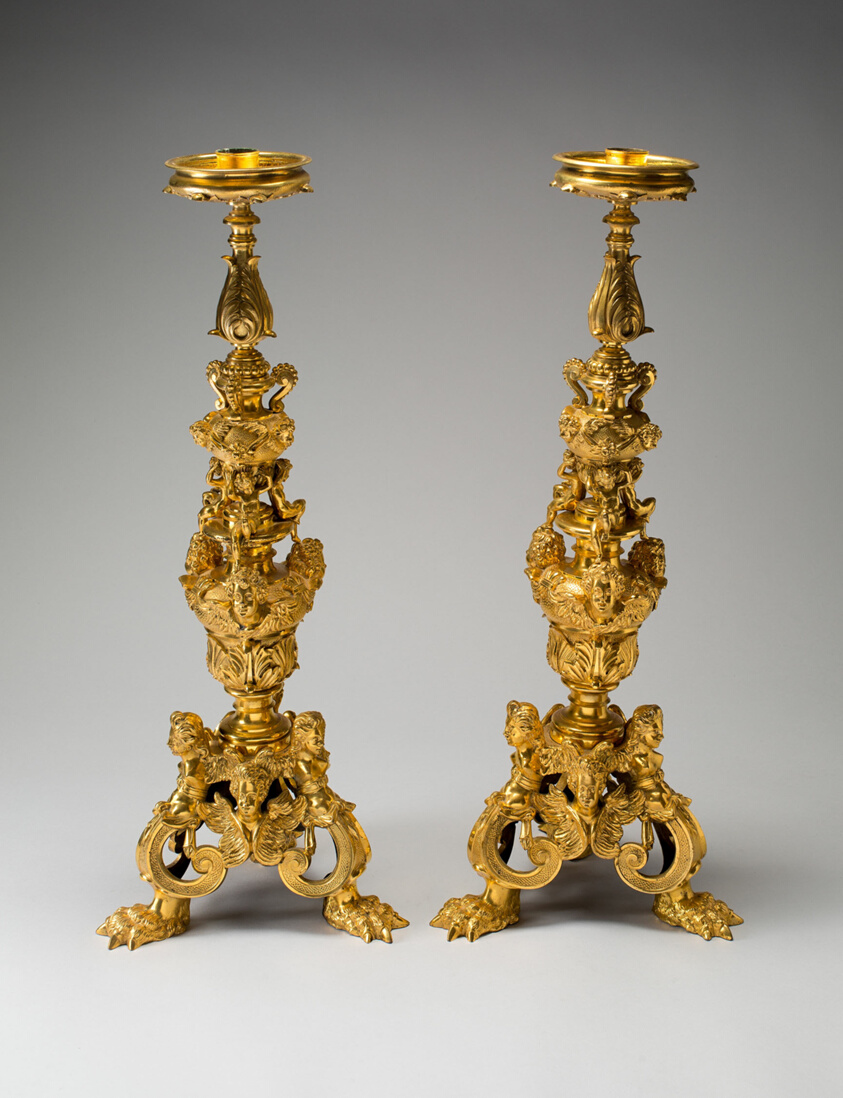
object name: Metalwork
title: Pair of Candlesticks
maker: Attributed to Francesco Bertos; Italian, active 1693-1710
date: c. 1680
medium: Gilt bronze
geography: Italy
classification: candleholder - candlestick; lighting device; furniture; european decorative arts; metalwork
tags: furniture